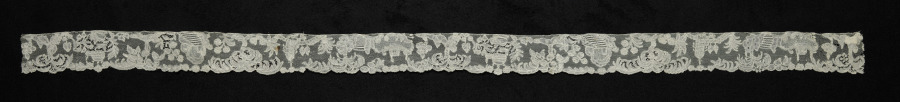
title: Lace Edging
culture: Belgium, Brussels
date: 1700s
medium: Linen: bobbin lace (Point d'Angleterre)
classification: Lace